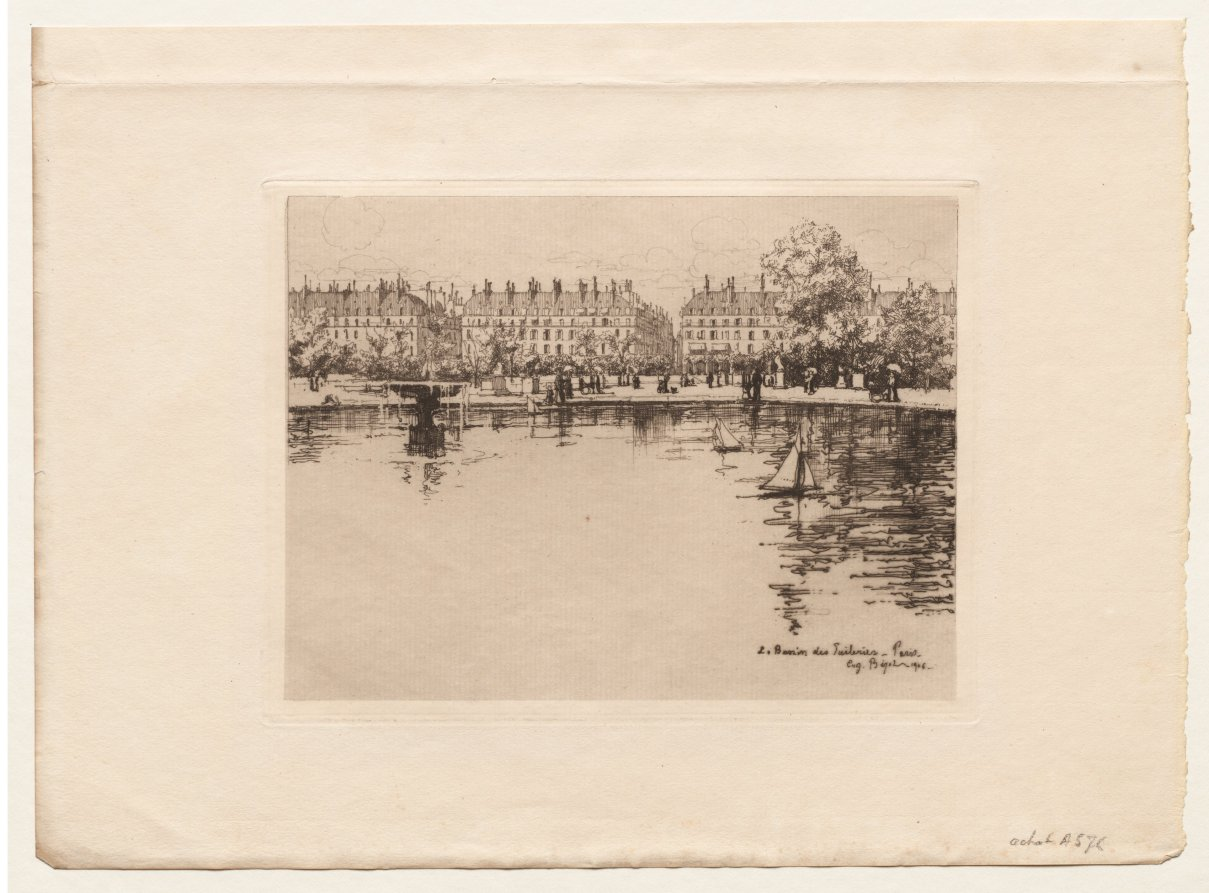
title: The Basin of the Tuileries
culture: France, 20th century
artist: Eugène Bejot (French, 1867–1931)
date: 1906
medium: etching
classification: Print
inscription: inscribed lower left, in plate: Le Baisin de Tuileries, Eug. Bejot